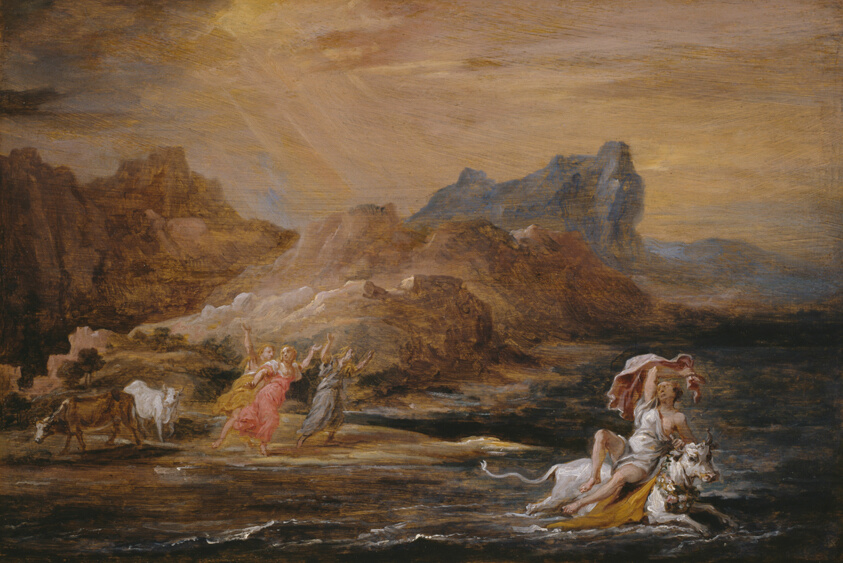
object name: Painting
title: The Rape of Europa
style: 17th Century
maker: David Teniers the Younger (Flemish, 1610–1690); After Titian (Italian, c. 1485/90–1576)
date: 1654/56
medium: Oil on panel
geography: Italy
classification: oil paintings (visual works); paint; painting; european painting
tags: women, bull, clouds, Greek gods, Greek mythology, landscape, mythological figures, mythology, sea, sun, zeus